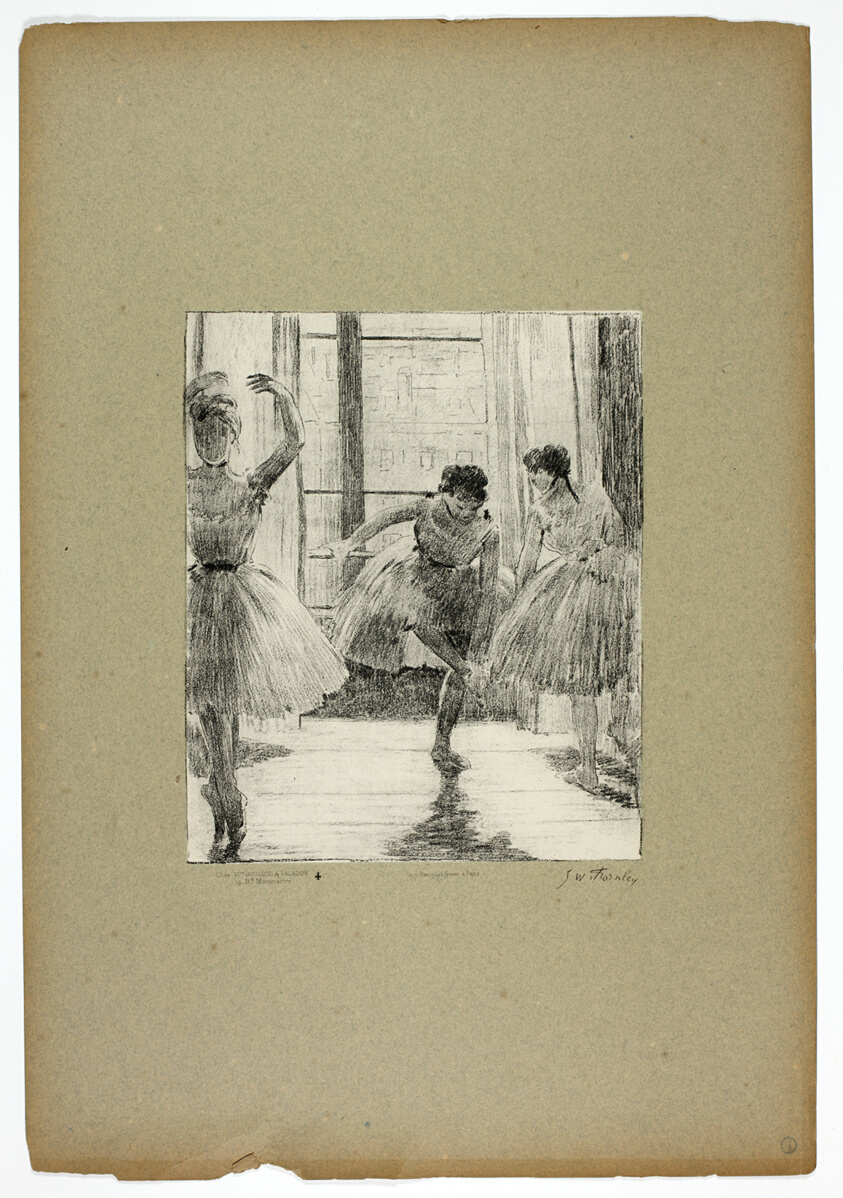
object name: Print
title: Before the Ballet Class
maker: Georges-William Thornley (French, 1857-1935); after Edgar Degas (French, 1834-1917); printed by Atelier Becquet (French, 19th century); published by Boussod, Valadon, & Company (French, 18th-19th century)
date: 1889–90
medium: Lithograph in black on paper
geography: France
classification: lithograph; print; prints and drawing